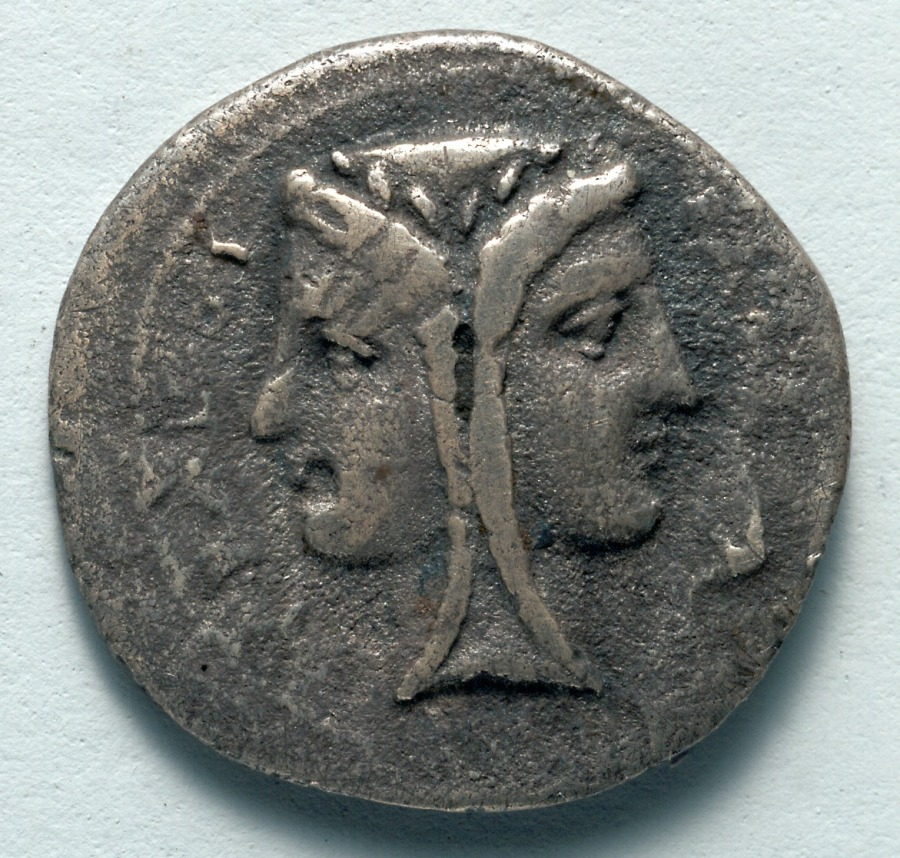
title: Two Litrae: Janiform Head (obverse); Horse (reverse)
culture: Greek, minted at Syracuse (Sicily)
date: 344–317 BCE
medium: silver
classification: Coins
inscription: ΣΥΡ[ΑΚΟΣΙOΝ]